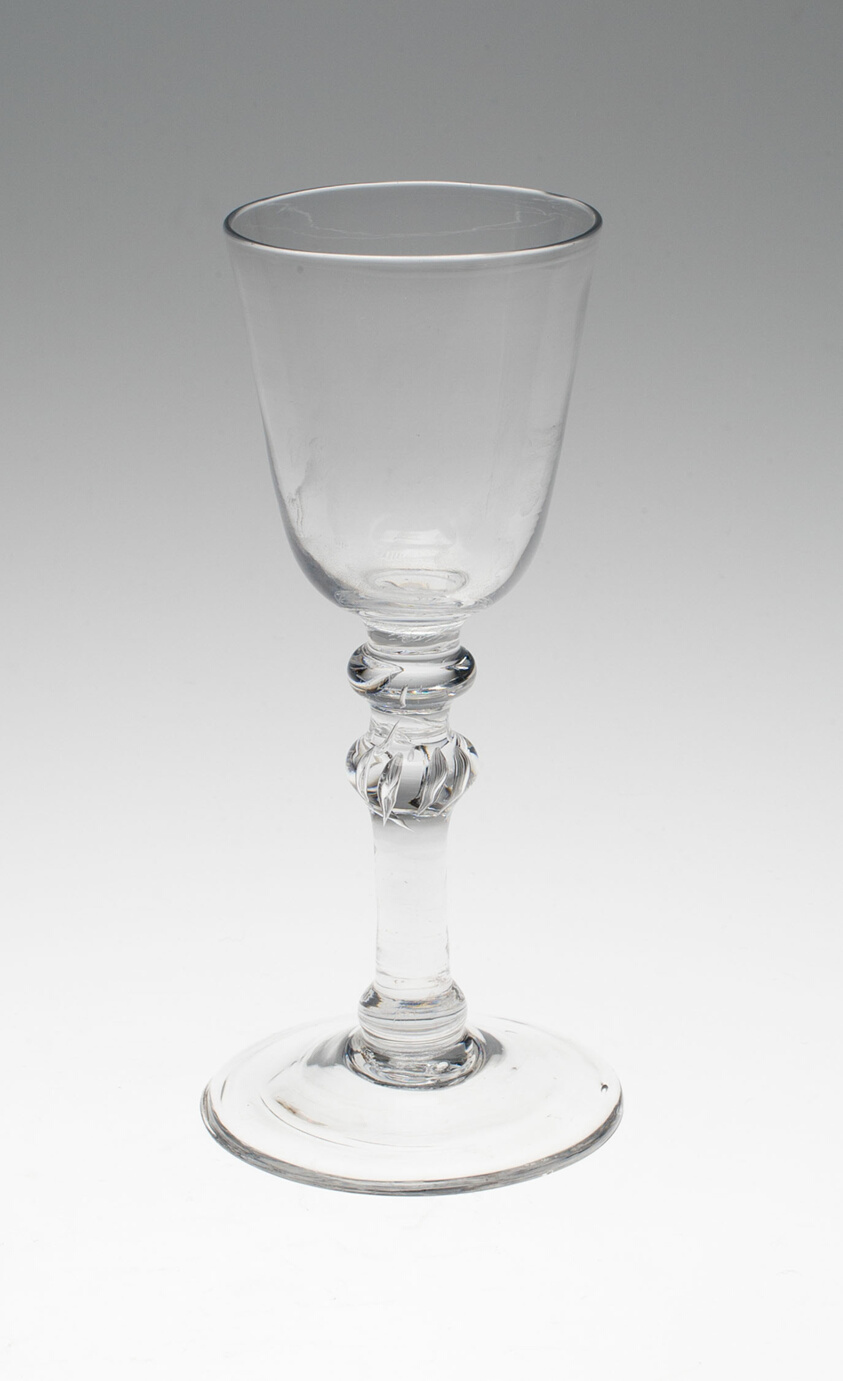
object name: Glass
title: Wine Glass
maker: England or Netherlands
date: c. 1795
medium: Glass; blown and stipple engraved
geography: England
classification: drinking vessel; glass; european decorative arts